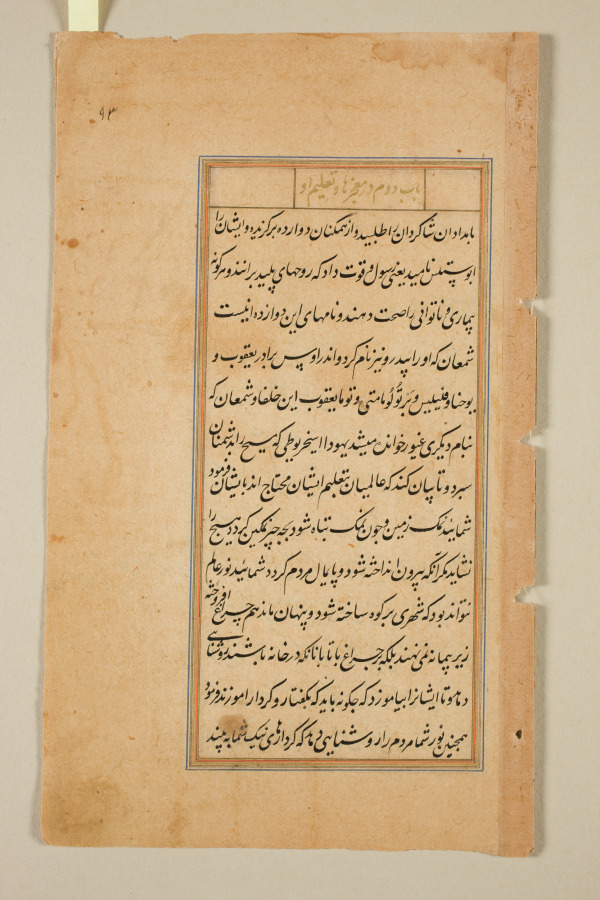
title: Text page from a Mirror of Holiness (Mir’at al-quds) of Father Jerome Xavier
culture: Mughal India, Allahabad, made for Prince Salim (1569–1627)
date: 1602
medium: Ink and gold on paper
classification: Manuscript